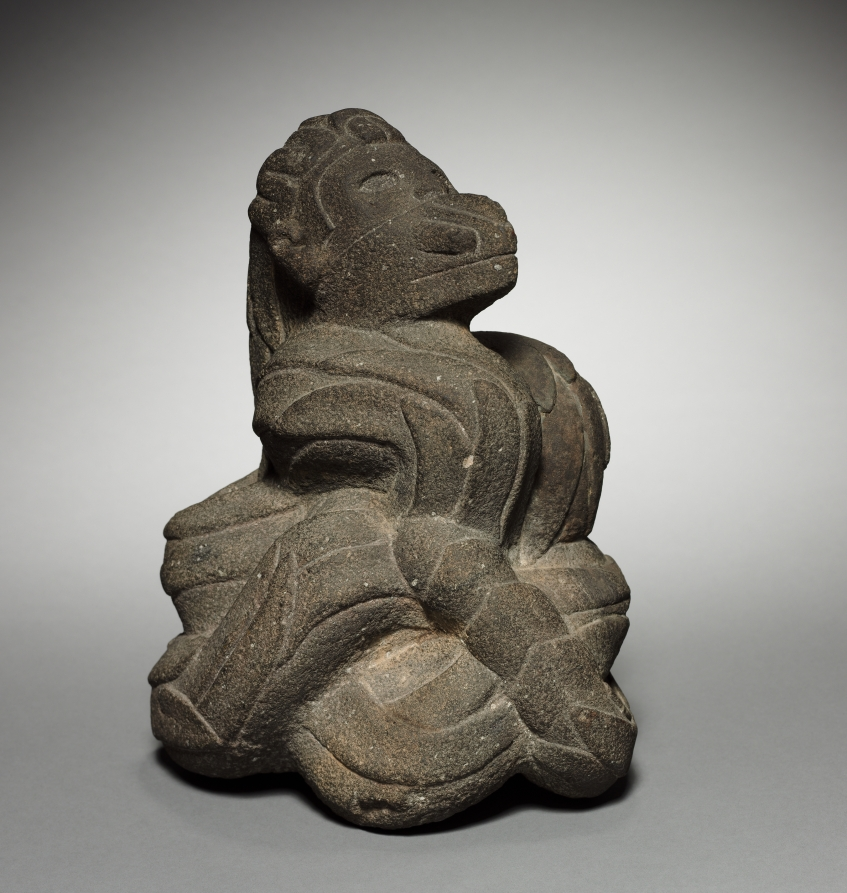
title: Feathered Serpent (Quetzalcoatl)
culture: Central Mexico, Aztec or modern, Post-Classic Period or modern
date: 1325–1521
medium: stone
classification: Stone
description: The museum bought this sculpture in 1941, when study of ancient American arts was in its infancy. It has many odd features, a few perhaps revealing an attempt to make the subject—the Aztec deity Quetzalcoatl (Feathered Serpent)—palatable to modern viewers. But it cannot absolutely be declared fake because some real Aztec sculptures are unusual. Analysis of the surface so far provides no help. Especially odd is the arrangement of the coils into bulges that suggest the pectorals, knees, and buttocks of a human body, as though the sculpture represents a human in a serpent costume. Real Aztec sculpture usually portrays the serpent's dangerous body more realistically. Also, the mouth mask—the insignia of a wind deity related to Quetzalcoatl and, thus, perhaps appropriate—is much larger in genuine sculptures. This suggests that, because the mask and its authentic proportion are strange to our eyes, a forger scaled it down. Other uncommon features include the incomplete carving of the ears, the fact that the human head does not emerge from a serpent's mouth, and more.